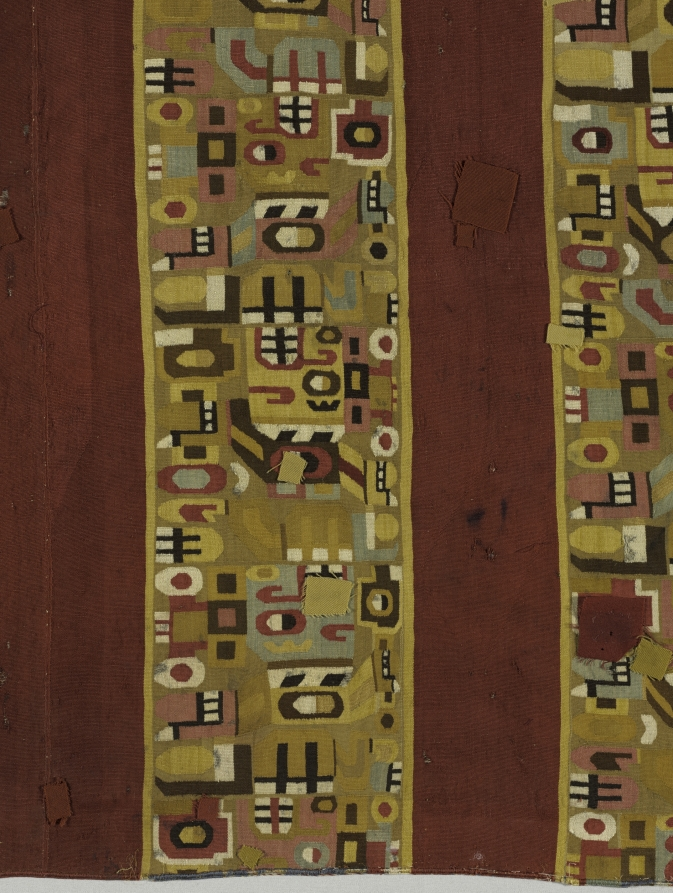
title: Tunic with Sacrificer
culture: South America, Peru, Central Andes, Middle Horizon, Wari people, 7th-11th century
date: 600–1000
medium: camelid-fiber, cotton; tapestry weave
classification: Textile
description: An extremely abstract supernatural sacrifice repeats in different colors and orientations across the body of this tunic, which was shortened on one side in antiquity. Look for the toothy black-and-white mouth in the sacrificer's upward-gazing head; other facial features include a button nose and a vertically divided eye. The figure holds the L-shaped haft of an axe behind its back and, at the front of its body, a short staff with a severed, upside-down human head on the top.